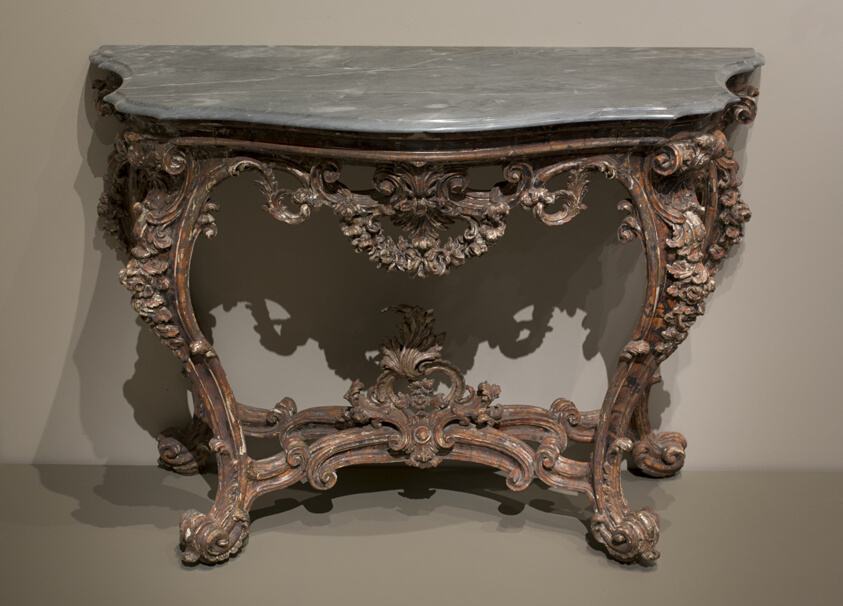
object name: Furniture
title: Console Table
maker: Naples, Italy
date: 1740/50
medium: Wood, painted and silvered; marble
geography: Naples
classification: table; furniture; european decorative arts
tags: furniture